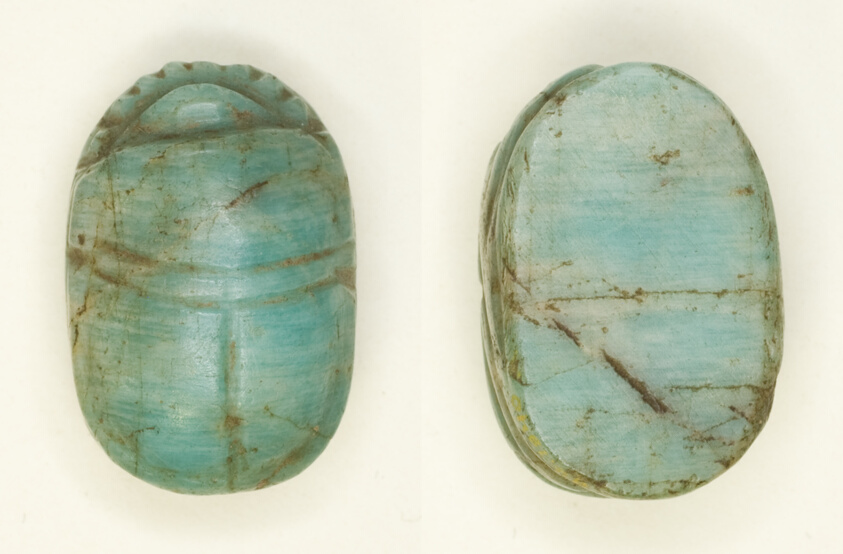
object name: Costume and Accessories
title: Scarab: Uninscribed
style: middle kingdom, ancient, egyptian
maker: Egyptian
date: Middle Kingdom (?), Dynasties 11–12 (about 2055–1773 BCE)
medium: Amazonite?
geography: Egypt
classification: scarab; stone; ancient art; costume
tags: scarab beetle